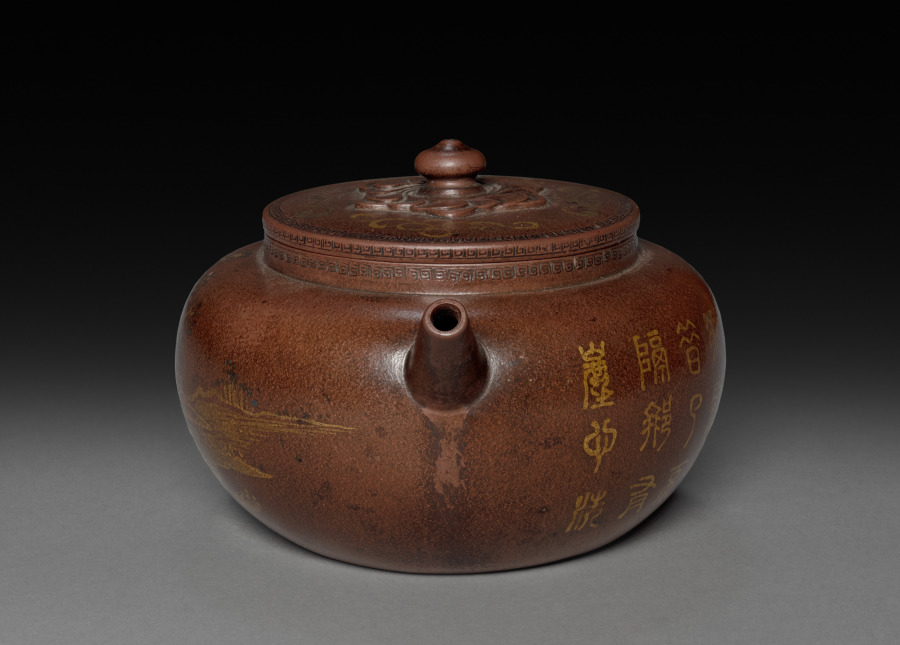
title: Teapot with Landscape and Imperial Poem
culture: China, Jiangsu province, Yixing, Qing dynasty (1644–1911), Qianlong reign (1736–95)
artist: Chen Hanwen (Chinese, active c. 1720s–90s)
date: 1762–95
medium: Stoneware, with gold pigment, Yixing ware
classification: Ceramic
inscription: 陳漢文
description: This teapot with a polished surface shows an imperial poem in gold on one side and a landscape on the other. The poem in archaic seal script was composed by the Qianlong emperor on his third southern inspection tour in 1762, when he traveled to southern China to solidify his rule. The base bears a stamped seal of its maker. Yixing potters produced teapots primarily for Ming dynasty literati-officials who valued simplicity and restraint, until the early Qing emperors introduced them at court.